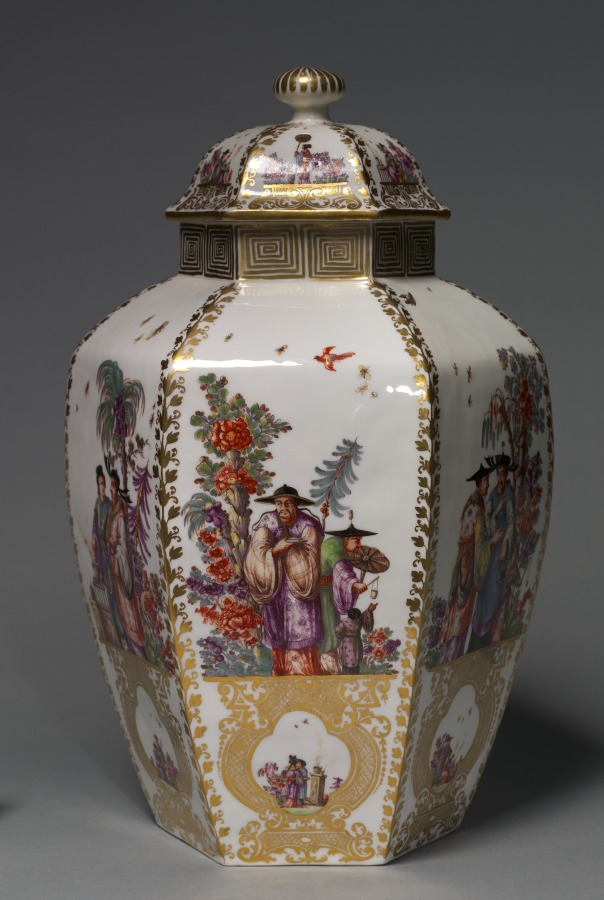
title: Covered Vase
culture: Germany, Meissen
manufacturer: Meissen Porcelain Factory (German, est. c. 1710)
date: c. 1728–30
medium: porcelain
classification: Ceramic